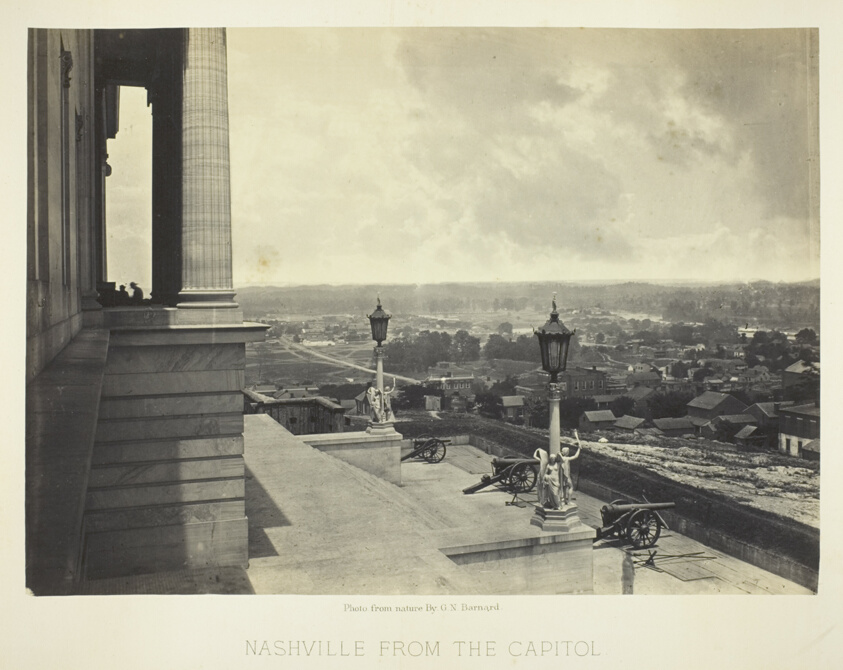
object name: Photograph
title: Nashville from the Capitol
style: 19th century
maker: George N. Barnard (American, 1819–1902)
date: 1864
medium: Albumen print, plate 3 from the album "Photographic Views of the Sherman Campaign" (1866)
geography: United States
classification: albumen silver print; photographic process; photography; photograph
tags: Collected by Hugh Edwards, Sherman's Campaign 1866